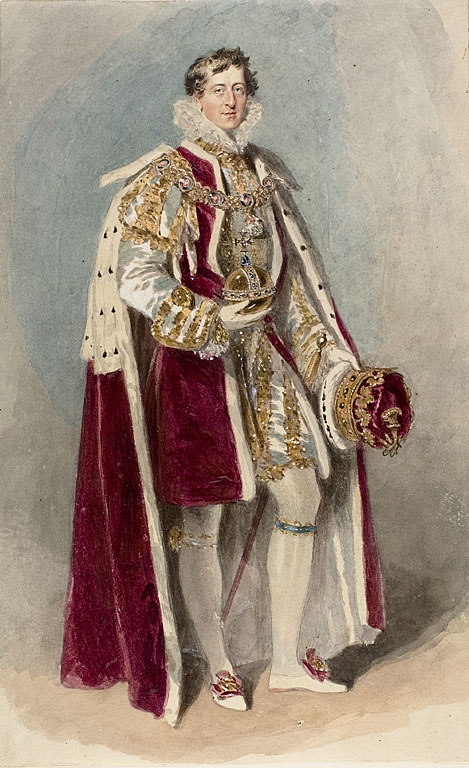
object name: Print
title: Duke of Devonshire Carrying the Orb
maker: Marie J. Naylor (English, active 1883-1904); or James Stephanoff (English, c. 1788-1874)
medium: Stipple engraving, with handcoloring, on cream wove paper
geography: England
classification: engraving; print; prints and drawing